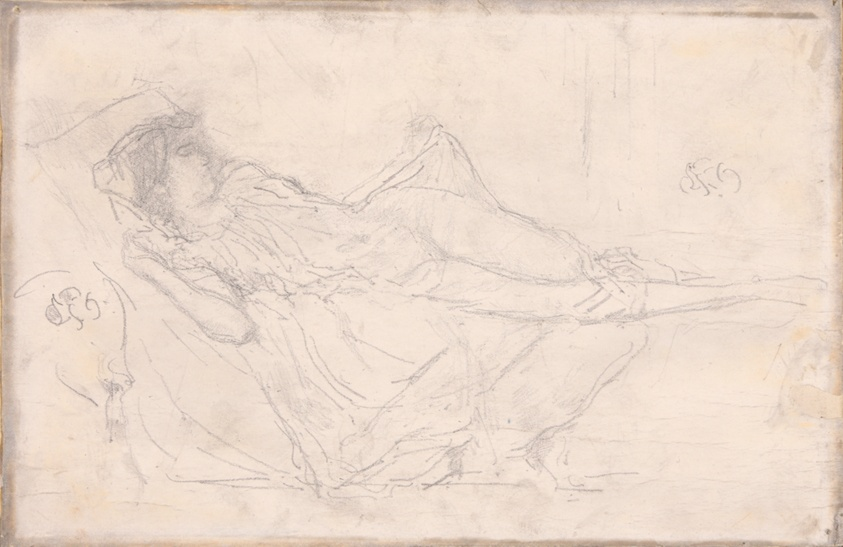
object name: Drawing and Watercolor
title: Reclining Draped Figure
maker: James McNeill Whistler (American, 1834-1903)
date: 1893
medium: Lithographic crayon, with traces of scraping and stumping, on fine-grained transfer paper laid down on cream wove paper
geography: United States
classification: drawings (visual works); prints and drawing; paper